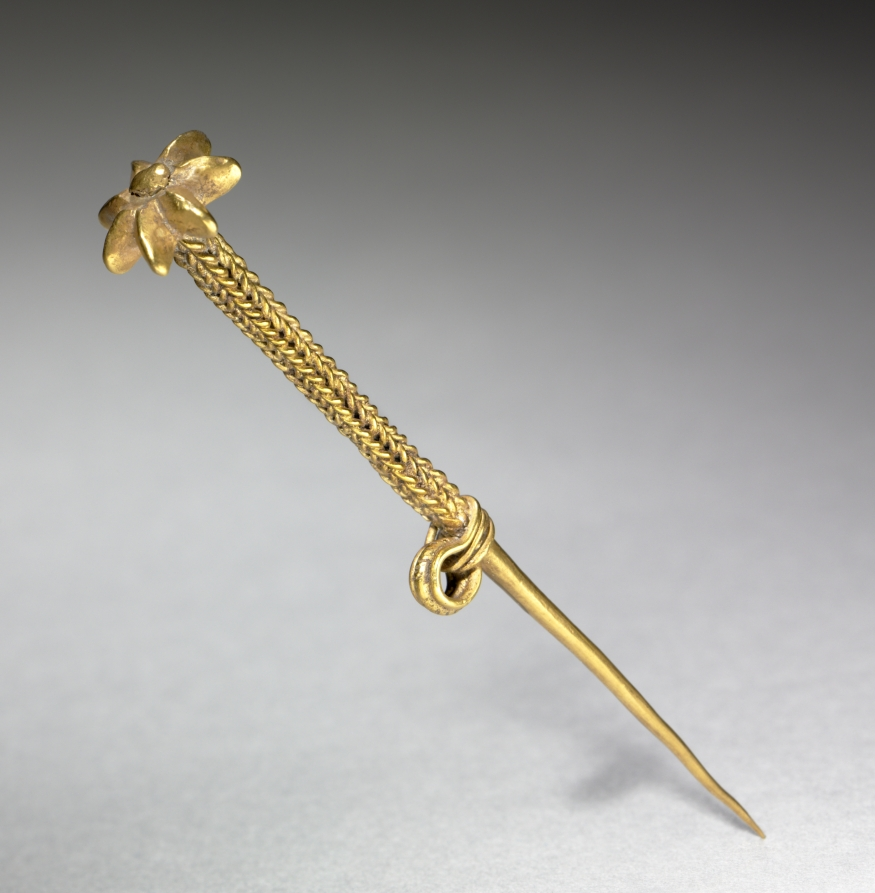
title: Toggle Pin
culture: Cyprus, late Cypriot II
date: c. 1300s BCE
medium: gold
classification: Jewelry